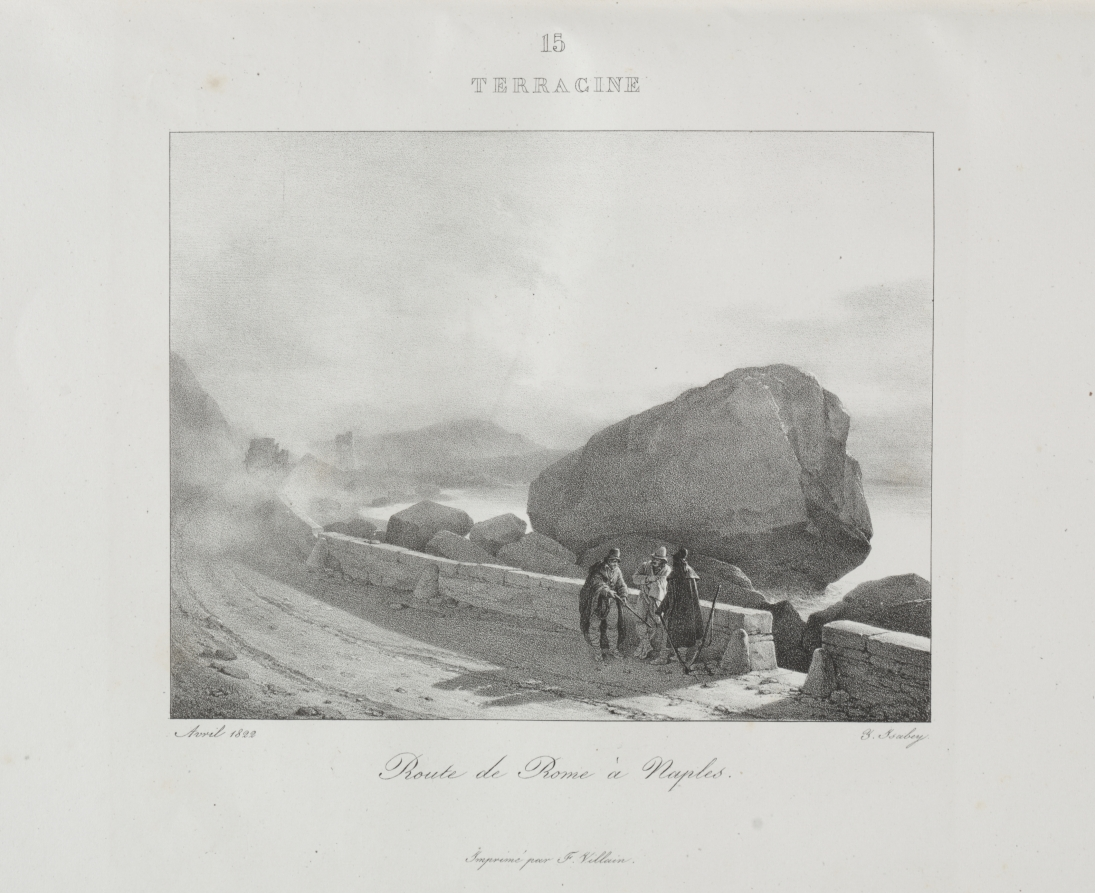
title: Voyage en Italie en 1822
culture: France, 19th century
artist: Jean-Baptiste Isabey (French, 1767–1855)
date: 1833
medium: lithograph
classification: Bound Volume